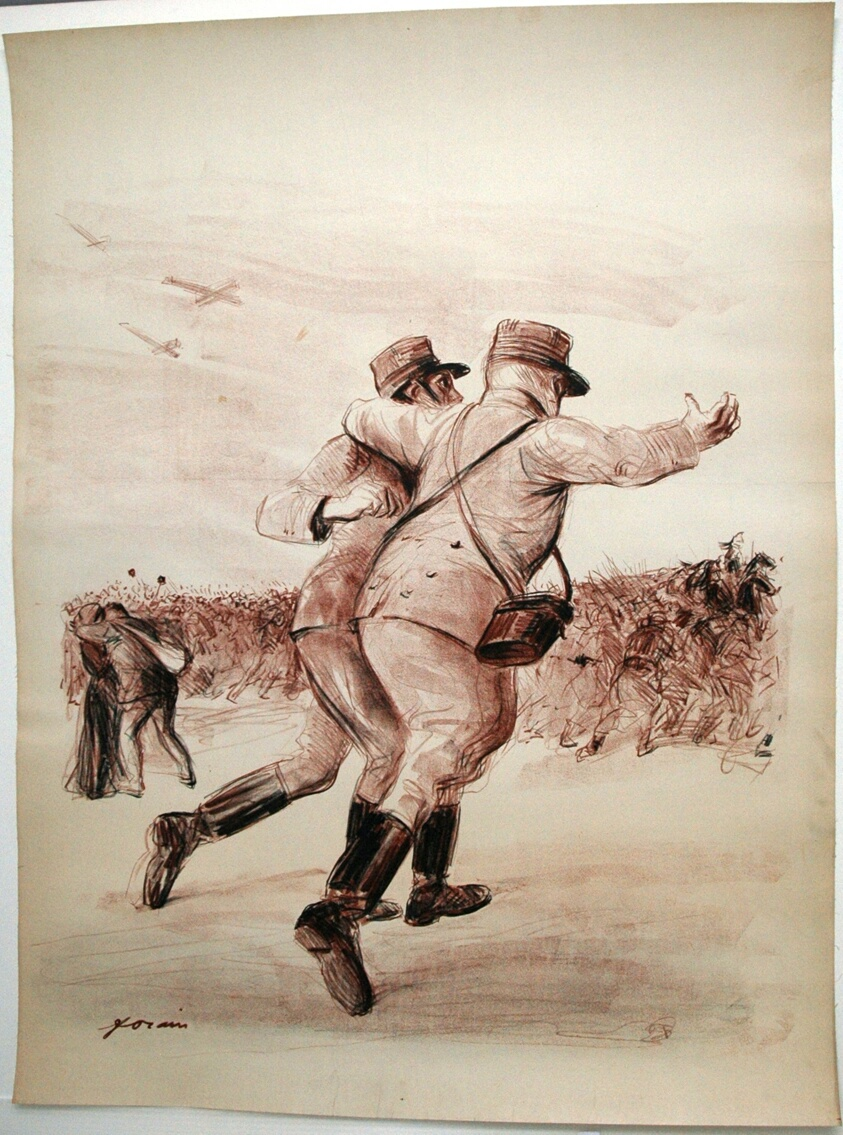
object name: Print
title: To Serve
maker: Jean Louis Forain (French, 1852-1931); Printed by Eugene Verneau & Henri Chachoin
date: 1913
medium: Color lithograph on cream wove paper laid down on linen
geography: France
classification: lithograph; print; prints and drawing